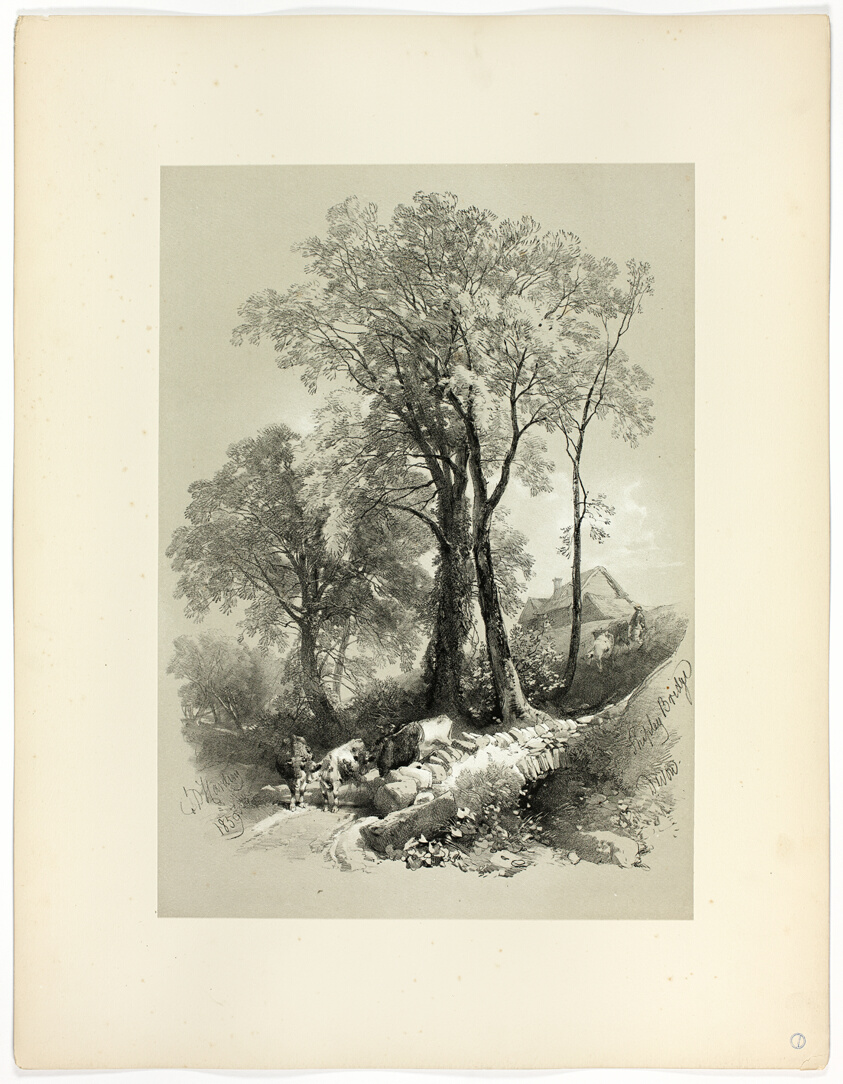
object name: Print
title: Shipley Bridge, Devon, from Picturesque Selections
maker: James Duffield Harding, (English, 1798-1863); Published by W. Kent and Co.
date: 1859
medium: Lithograph on paper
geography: England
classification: lithograph; print; prints and drawing